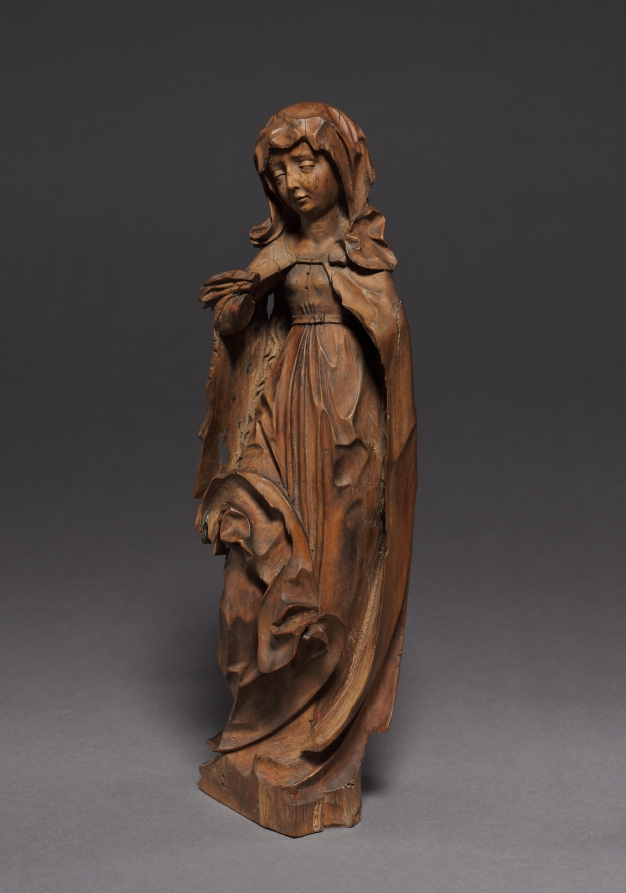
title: Mourning Virgin from a Crucifixion Group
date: about 1620/40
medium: pearwood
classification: Sculpture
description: This statuette once formed part of a Crucifixion group intended for a domestic shrine or chapel. Such ensembles were not only used for private devotion and meditation, but were also collected as works of art. This work was long attributed to the Nuremberg artist Veit Stoss. In fact, the carver imitated forms from his repertoire. However, the concave folds do not occur before 1600. The sculpture was created at a time when the appreciation for Albrecht Dürer, the most famous German painter of his time, was also experiencing a renaissance.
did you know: Looking closely, you can see that the sculptor carved tears under Mary's eyes. They show her pain over Christ hanging on the cross.